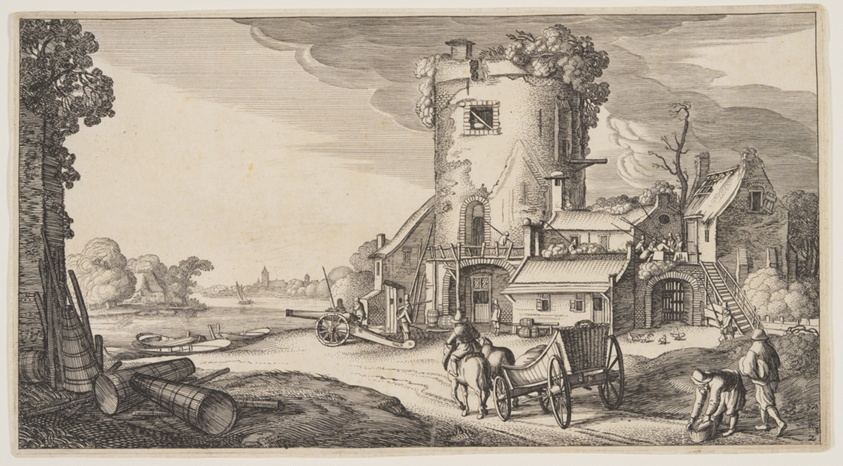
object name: Print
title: Watch-Tower Near a River, from Landscapes (Playsante Lantschappen)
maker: Attributed to Claes Jansz. Visscher II (Dutch, 1586-1652); after Jan van de Velde II (Dutch, c. 1593-1641)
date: c. 1641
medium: Etching, with engraving, on ivory laid paper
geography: Netherlands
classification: etching; paper; print; prints and drawing